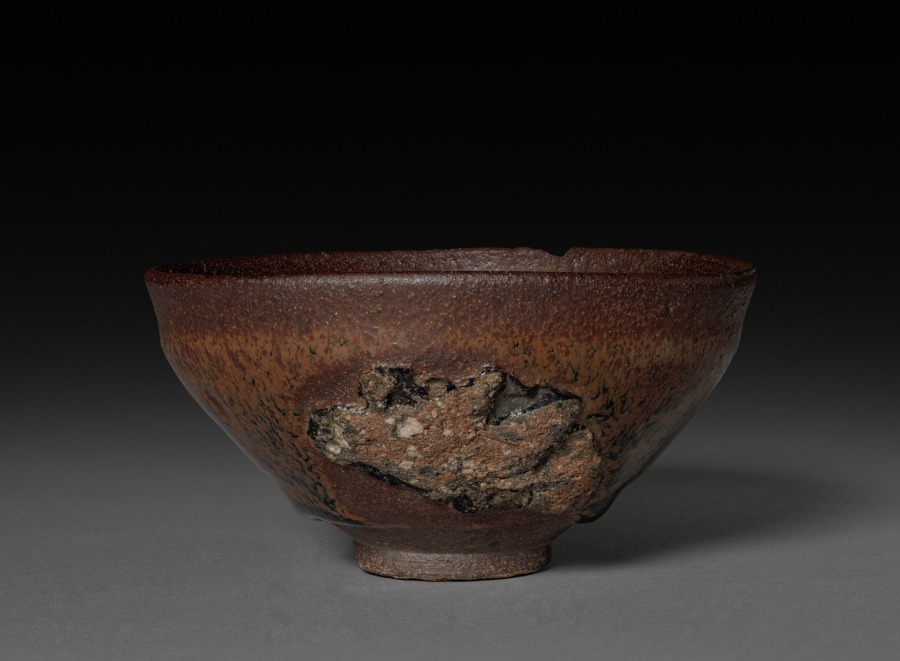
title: Tea Bowl: Jian ware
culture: China, near Shui ch'i, Song dynasty (960-1279)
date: 960–1279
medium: stoneware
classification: Ceramic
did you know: Jian ware was very popular with the tea cultures in China and Japan.